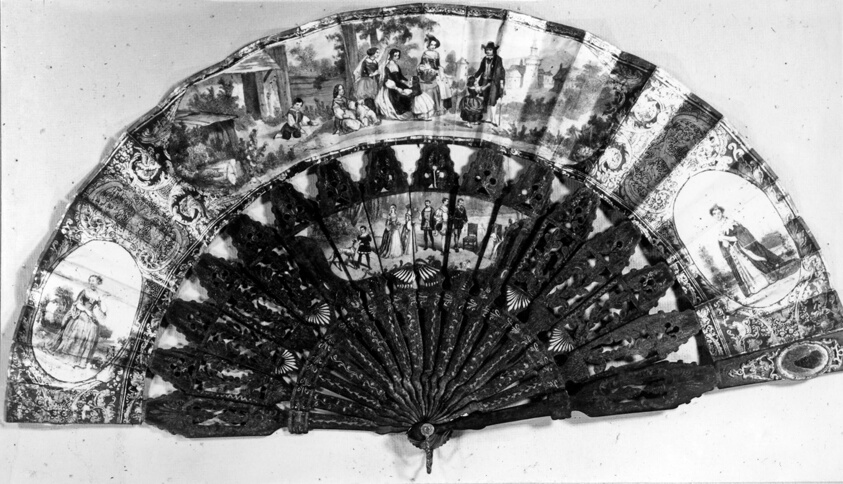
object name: Costume and Accessories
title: Fan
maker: Italy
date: 19th century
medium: Carved and painted wood sticks and guards; painted paper mount; mirror set in guard on front; cameo set in guard on reverse; metal reivet and loop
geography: Italy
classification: textile; fan - paper; costume accessory - folding fan; costume